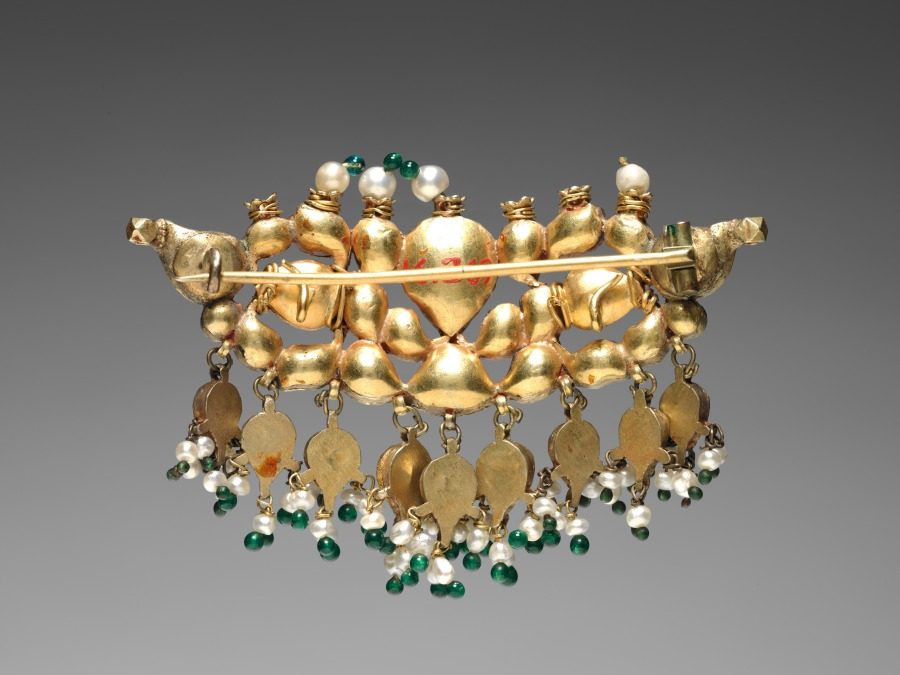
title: Brooch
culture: India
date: 1800s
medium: silver gilt with diamonds, emeralds, rubies and pendant pearls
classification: Jewelry